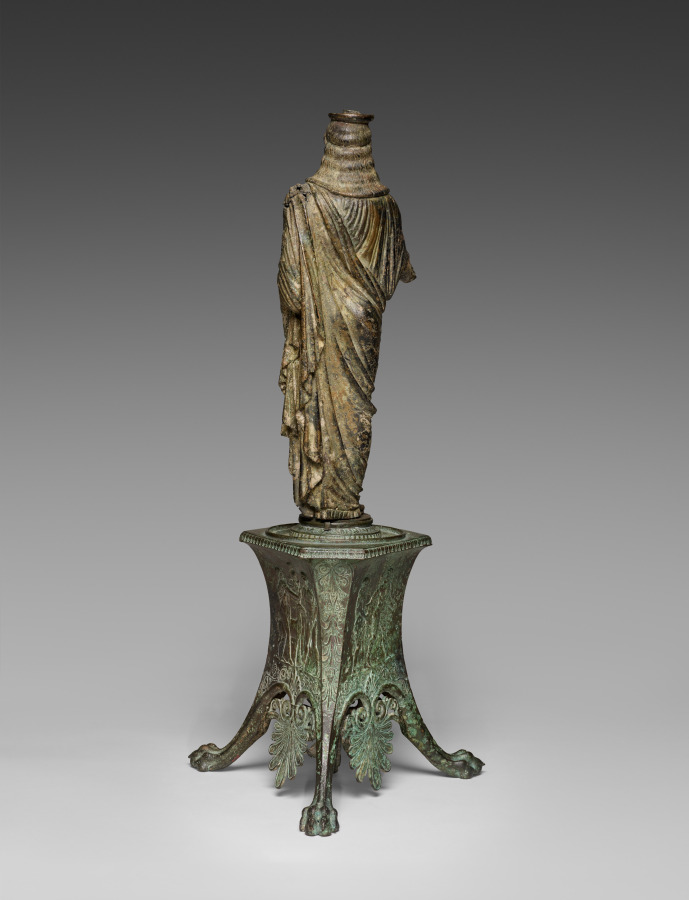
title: Tripod Base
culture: Italy, Roman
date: 100–1 BCE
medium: bronze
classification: Sculpture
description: This unusual tripod base features three clawed feet, an abundance of vegetal ornament, and three different figural scenes in low relief. Two seem to show sanctuary settings: first, a small Archaistic statue of Athena flanked by a woman with small offerings and a man holding a kid and leading two goats; and second, a small youthful male statue behind two beardless figures—perhaps Apollo, with a stag, and Dionysos, holding a thyrsos. The third scene shows Herakles, holding a club while leading a woman, maybe Auge or Alcestis. Although perhaps similarly eclectic in style, the base and the sculpture it now supports differ in their alloys and patinas.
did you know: This elaborate base may have originally supported an ornate lamp (not the statuette now displayed atop it).